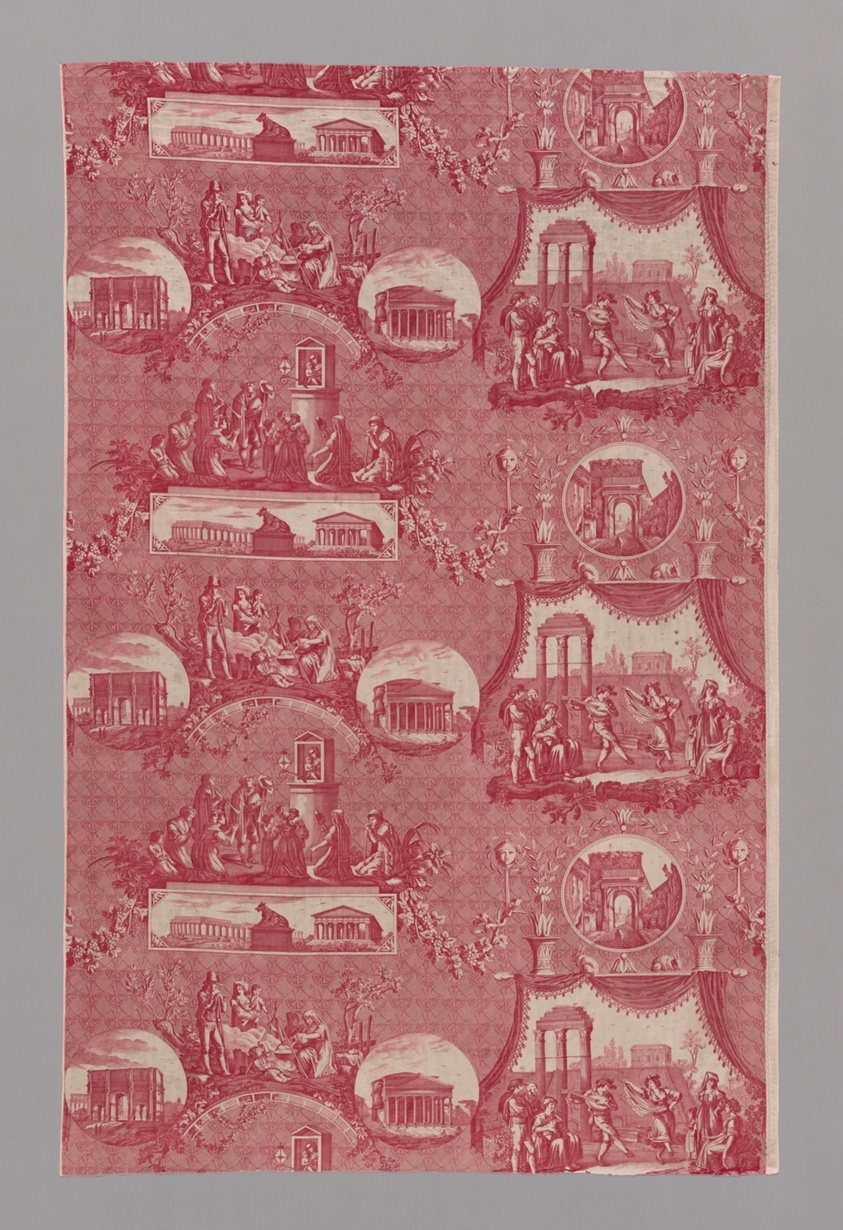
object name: Textile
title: Le Romain (The Roman) (Furnishing Fabric)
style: jouy-en-Josas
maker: Designed by Jean Baptiste Huet (French, 1745–1811) after etchings by Bartolomeo Pinelli (Italian, 1781–1835) engraved by Jules Mallet (French, 1759–1835); Manufactured by Christophe-Philippe Oberkampf (naturalized French, 1738-1815), Oberkampf Manufactory (French, 1760-1843); Jouy-en-Josas, France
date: 1811/1821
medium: Cotton, plain weave; engraved roller printed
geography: Jouy-en-Josas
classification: textile; weaving - printed; furnishing textile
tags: Rome, arches, architecture, buildings, children, churches, dance, dancing, Madonna, men, musical instruments, people, praying, rabbits, shrines, temple, Virgin and child/Madonna and child, Virgin Mary, women, worship